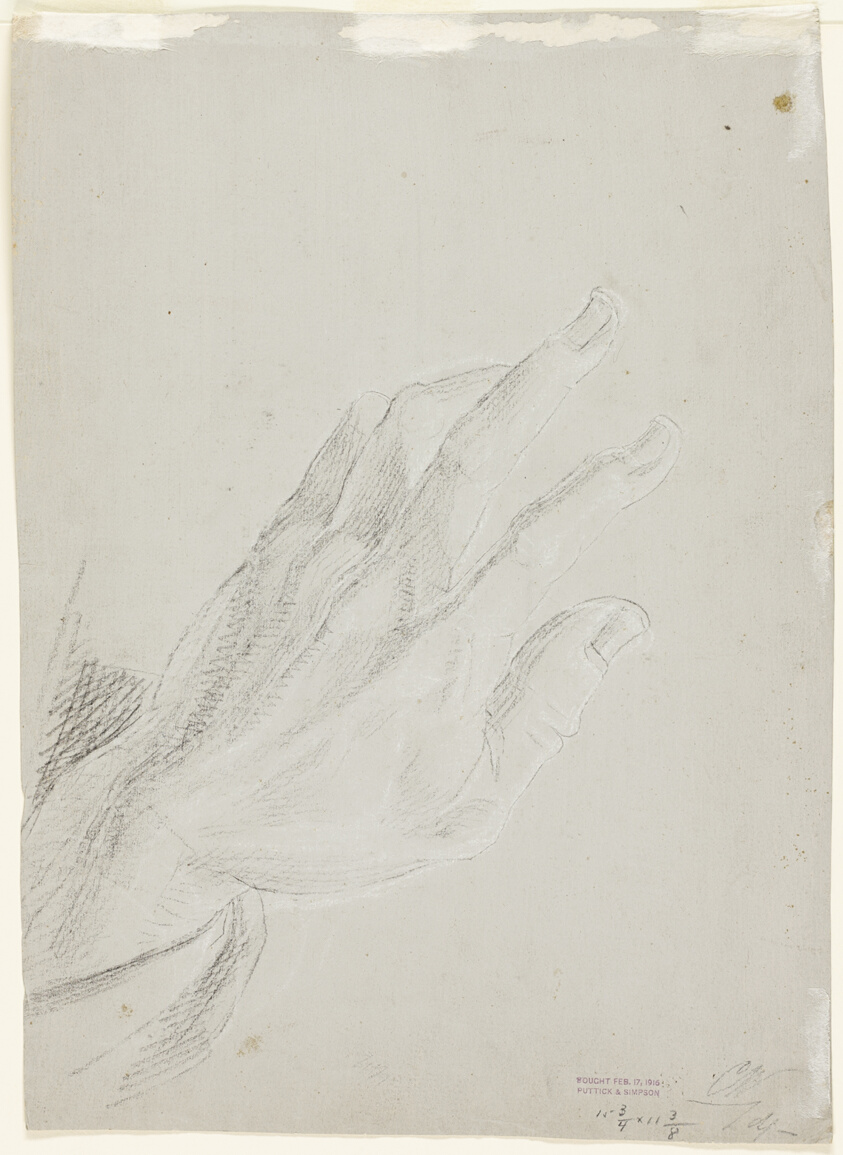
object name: Drawing and Watercolor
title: Portrait of Fuseli (recto); Sketch of a Hand (verso)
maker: Attributed to Henry Fuseli; Swiss, active in England, 1741-1825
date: 1761/1825 (recto); 1770/80 (verso)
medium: Black chalk (recto), and black and white chalk on gray prepared ground (verso), on tan wove paper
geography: England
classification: chalk; drawings (visual works); prints and drawing; paper